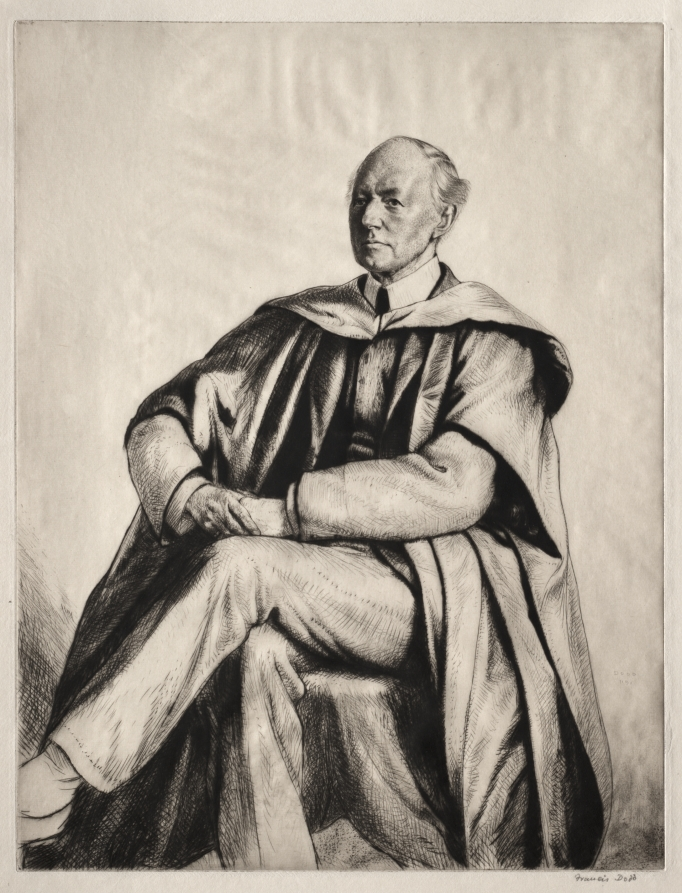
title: A. J. Donkin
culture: England, 20th century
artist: Francis Dodd (British, 1874–1949)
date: 1911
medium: drypoint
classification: Print